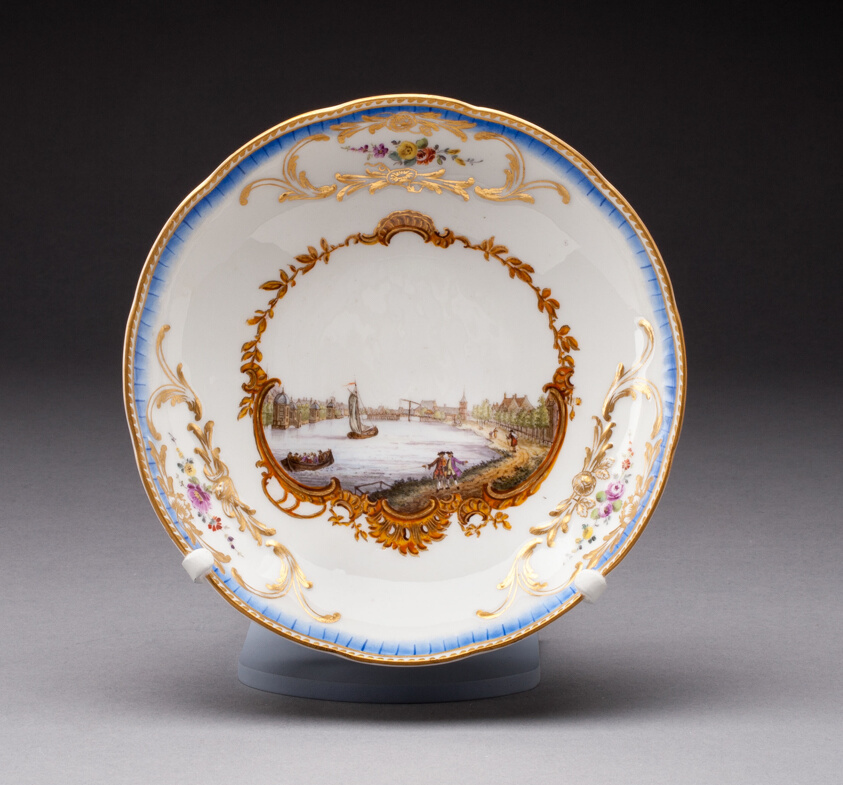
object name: Ceramics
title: Saucer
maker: Meissen Porcelain Manufactory (German, founded 1710)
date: c. 1772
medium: Hard-paste porcelain, polychrome enamels, and gilding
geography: Meissen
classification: teaware; porcelain; european decorative arts; ceramics